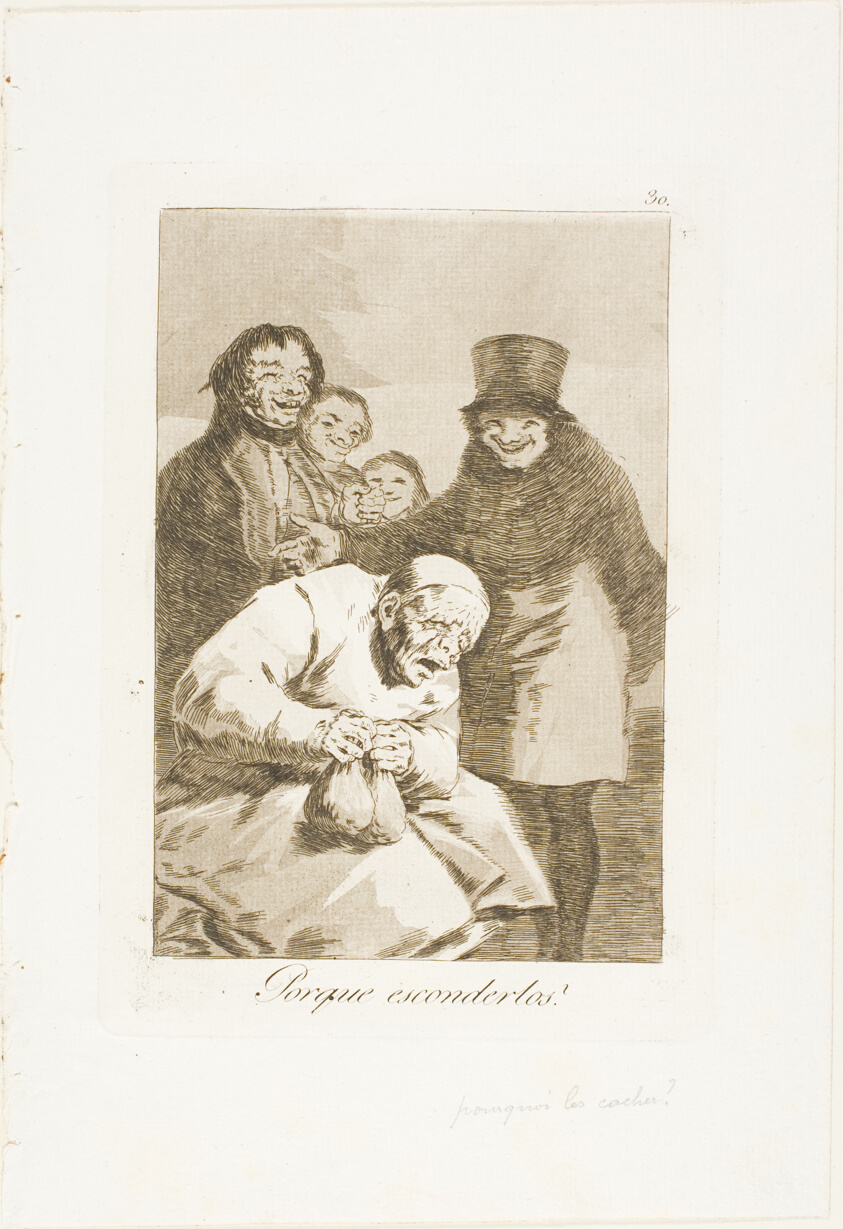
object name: Print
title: Why Hide Them?, plate 30 from Los Caprichos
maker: Francisco José de Goya y Lucientes (Spanish, 1746-1828)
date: 1797/99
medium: Etching and aquatint on ivory laid paper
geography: Spain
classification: etching; print; prints and drawing